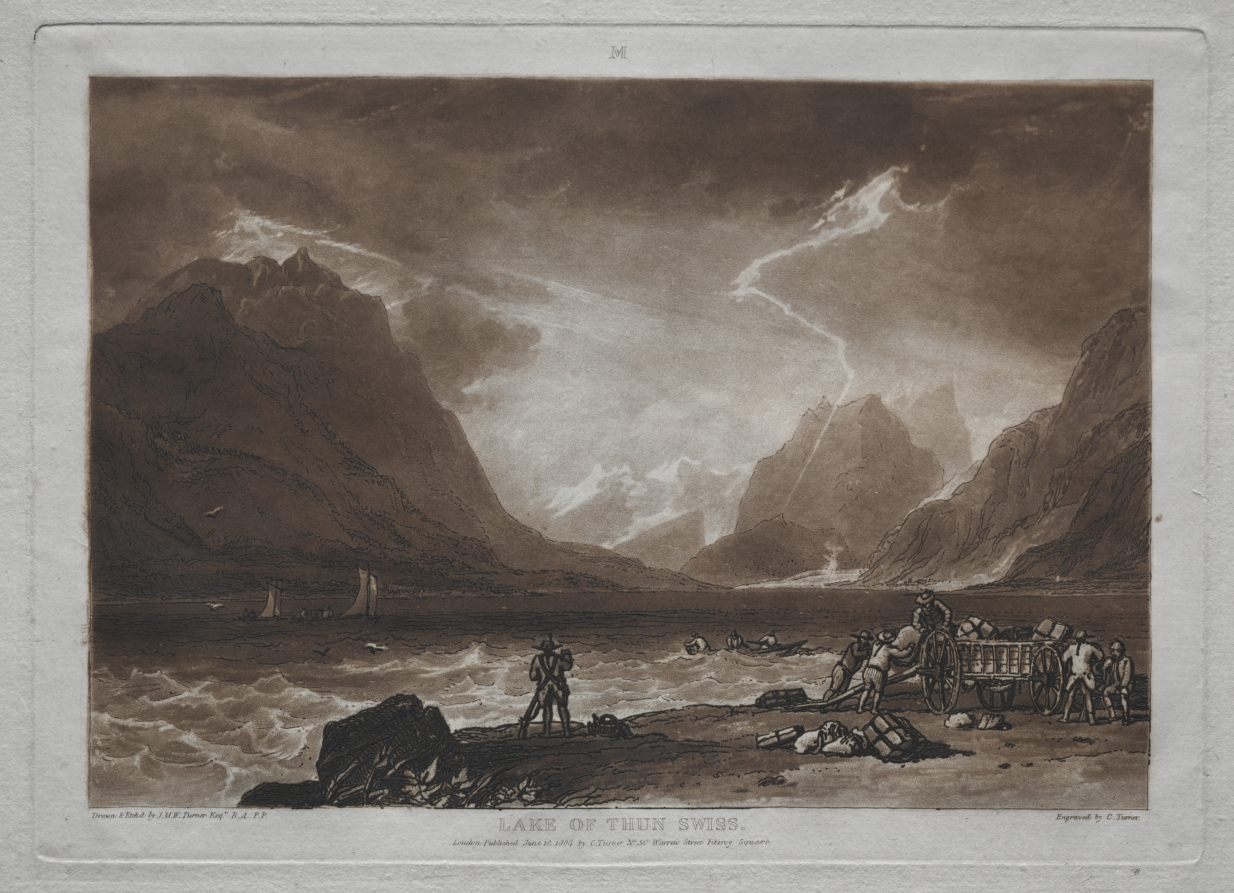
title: Liber Studiorum: Lake of Thun, Swiss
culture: England, 19th century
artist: Joseph Mallord William Turner (British, 1775–1851)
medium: etching and mezzotint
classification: Print